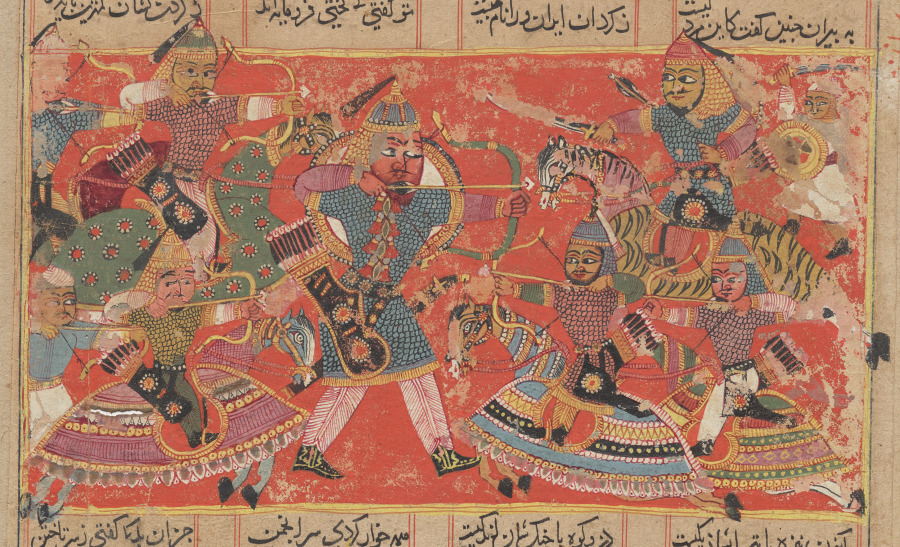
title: Rustam Takes Aim at Ashkabus, from a Shah-nama (Book of Kings)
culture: Sultanate India, Deccan or Malwa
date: c. 1425–50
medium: Gum tempera and ink on paper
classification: Painting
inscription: The heavens themselves echo the action of the arrow;/ Fate said “Take it!” and Fortune nodded “Give!”/ The Heavens cried, “Excellent!” and the Moon said “Well Done!”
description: The central warrior is Iran’s mythic hero Rustam, who approached an enemy army on foot, aiming to shoot the general off his mount. This page is from the oldest surviving illustrated Islamic manuscript made in India. The painting is by a local artist working for a Sultanate patron in India who admired Persian literature and emulated the erudite court culture of Iran.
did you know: In the upside-down inscription in the top margin: The Heavens cried, “Excellent!” and the Moon said “Well Done!”